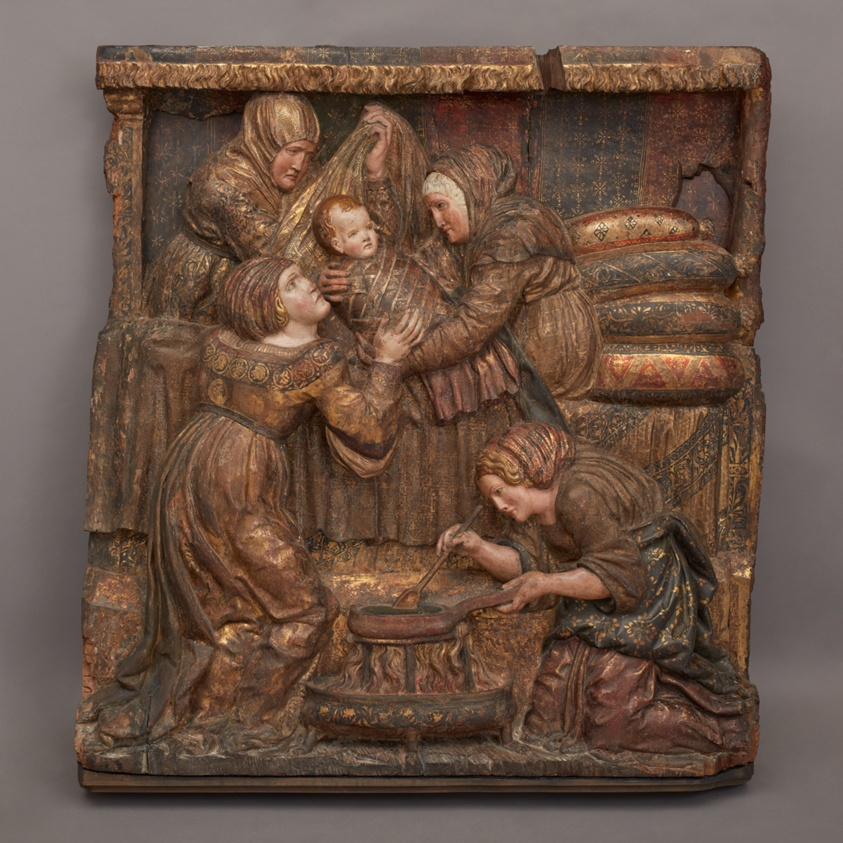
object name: Sculpture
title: The Birth of Saint John the Baptist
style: sixteenth century, 16th Century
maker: Artist unknown (Spanish (Burgos), active 16th century)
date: c. 1525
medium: Wood, polychromy, and gilding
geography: Spain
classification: relief; sculpture; sculpture/wood; spanish; wood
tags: religious scenes, bed, fire, women, woman, babies, birth, Christianity, Christian subjects, Saint John the Baptist, saints, religious figures, religious, religion